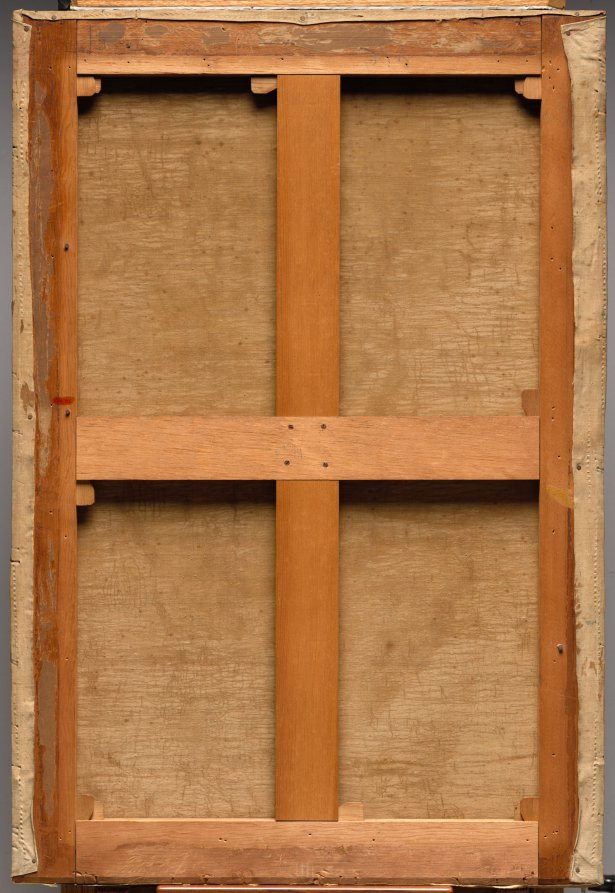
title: A Calling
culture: France, 19th century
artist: William Adolphe Bouguereau (French, 1825–1905)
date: 1896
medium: oil on fabric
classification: Painting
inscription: Signed lower right: w. bouguereau 1896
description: Seated on a stone step in the countryside, a young girl has realized that her calling in life is to be an artist. Bouguereau was famous for his innovative depictions of children. In 1900 a critic wrote, "[F]ew artists have represented childhood with more tenderness, charm, and spirit than Bouguereau . . . [H]e has invented the most picturesque, the most pleasing, the most original scenes of an almost endless variety." Bouguereau was no less famous for his remarkably life-like images. Here he convincingly captures the girl's rough clothing, soft skin, and intense gaze. Bouguereau painted this work in La Rochelle, a harbor city on France's west coast. During the later years of his life, Bouguereau—by then wealthy and famous—made a habit of spending summers in La Rochelle. There the artist lived in a mansion he owned near the port, working in a greenhouse he had converted into a studio or in the countryside. While in La Rochelle, Bouguereau chose his models from among farm workers, families of local fishermen, or his own servants.